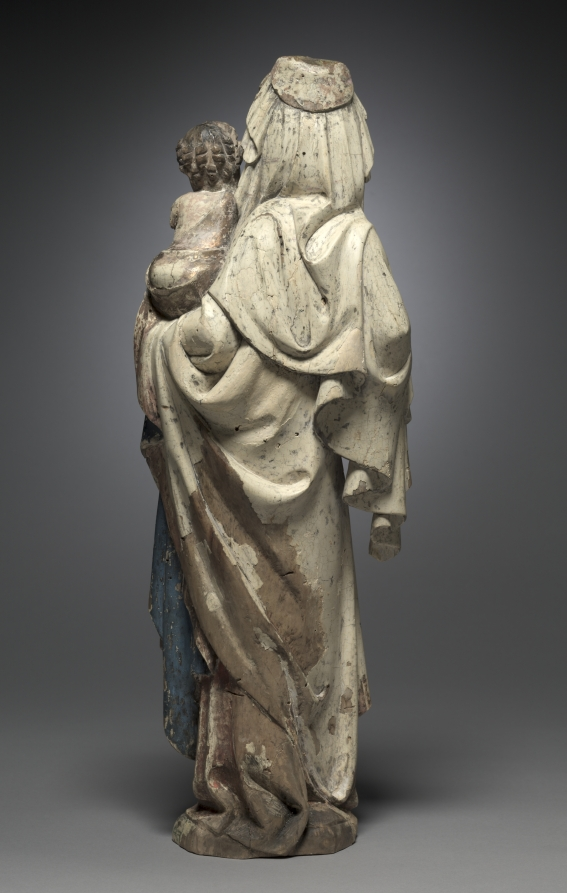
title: Virgin and Child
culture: Austria, Diocese of Passau, 14th century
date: c. 1370–1380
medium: painted lindenwood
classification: Sculpture